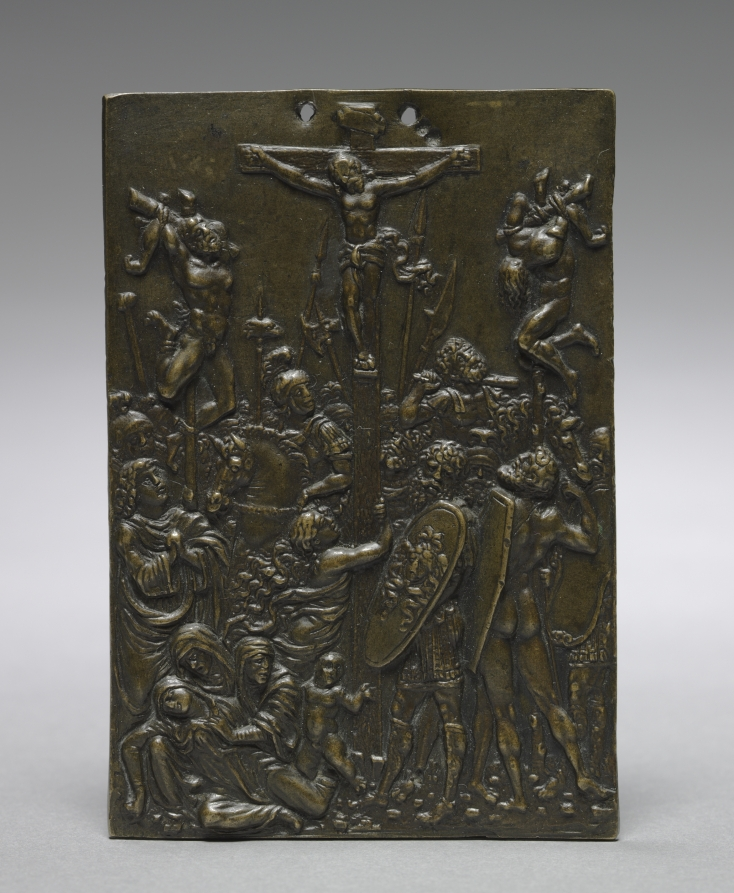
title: The Crucifixion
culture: Italy, 16th century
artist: Moderno (Italian, 1467–1528)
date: 1500s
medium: bronze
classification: Sculpture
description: Moderno's Crucifixion demonstrates his ability to create rhythmic and dramatic compositions on a small scale. The writhing of the crowded figures and tortuous thieves is counterbalanced by the strong, classical body of Christ on the towering vertical of the cross. As the emotional and structural apex of the relief, the serenity of Christ's passing recalls his divine promise of salvation. The Crucifixion was one of Moderno's most popular designs and, after his death, his son Giambattista continued to reissue and rework his father's compositions from the family workshop. These plaquettes were so widely appreciated and influential that there are several variations and generations of Moderno's originals, including ones made well into the 20th century. In fact, another version of the Crucifixion exists in the museum's collection (1969.259), likely a later cast after Moderno's design.